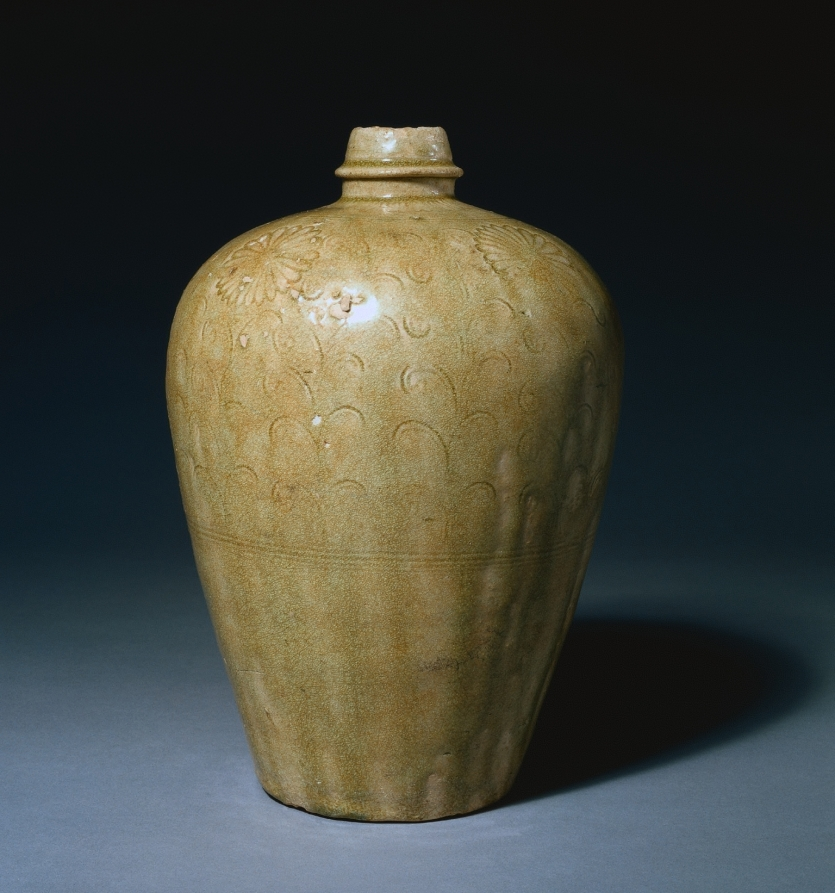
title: Wine Flask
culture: Japan, Kamakura period (1185–1333)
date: c. 1300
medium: Stoneware with ash glaze and underglaze stamped and incised decoration (Seto ware)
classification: Ceramic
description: This wine flask (heishi) was produced in Seto, in present-day Aichi prefecture near the city of Nagoya. Seto ware was made in imitation of Chinese Song dynasty prototypes, and was unique among Japanese ceramics for being glazed at the initial time of its production in the late 1200s. Such wares were later prized for display in tea practice.